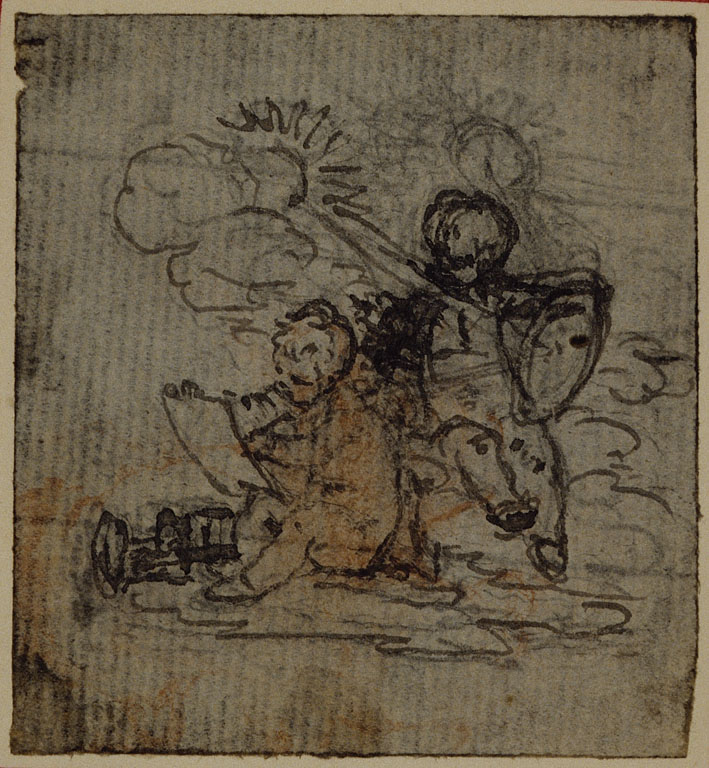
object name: Drawing and Watercolor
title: Study for Vignette-Frontispiece of Tacitus "Tibère, ou Les Six Premiers Livres des Annales", Vol. 1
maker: Hubert François Gravelot (French, 1699-1773)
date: c. 1768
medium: Pen and black ink, with graphite and red chalk, on gray laid paper, incised for transfer and perimeter mounted on ivory laid paper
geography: France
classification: pen and ink drawings; drawings (visual works); prints and drawing